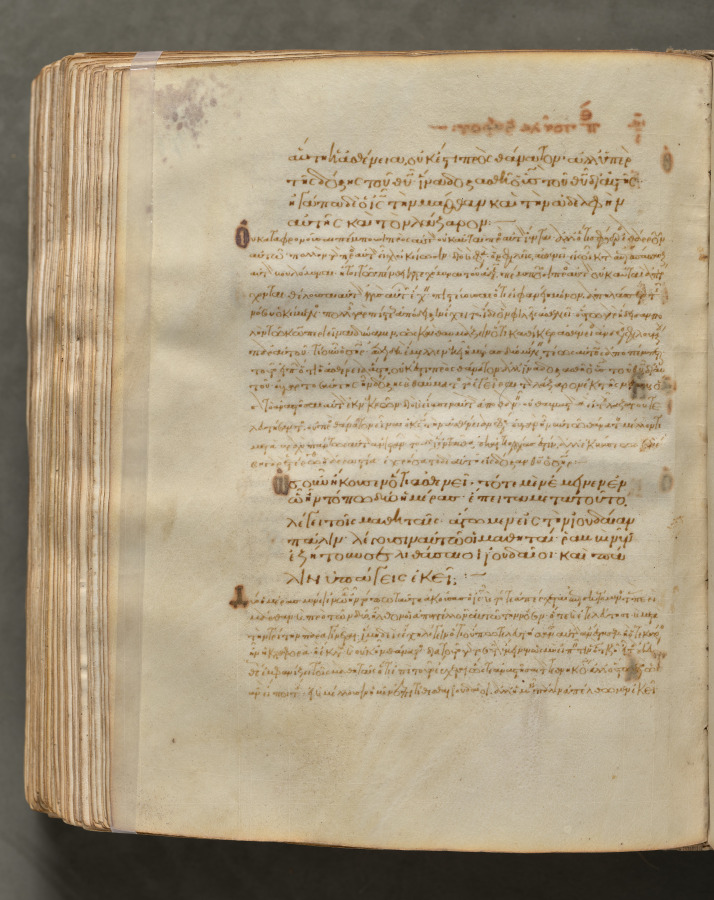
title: Text, folio 376 (verso), from a Gospel Book with Commentaries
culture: Byzantium, Constantinople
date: c. 1000–1100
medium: ink, tempera, and gold on vellum; leather binding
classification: Bound Volume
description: Each of the four gospels in this book opens on a page with brilliantly illuminated borders depicting the author of the text as well as birds—principally peacocks, symbols of the immortality of the soul—and fountains, representing the fountain of life and the salvation of the soul. This volume consists of 428 leaves with texts in Greek. Its level of sophistication suggests that it was probably written and decorated in a monastery in Constantinople.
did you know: Gospel books were carried in procession through Byzantine churches.